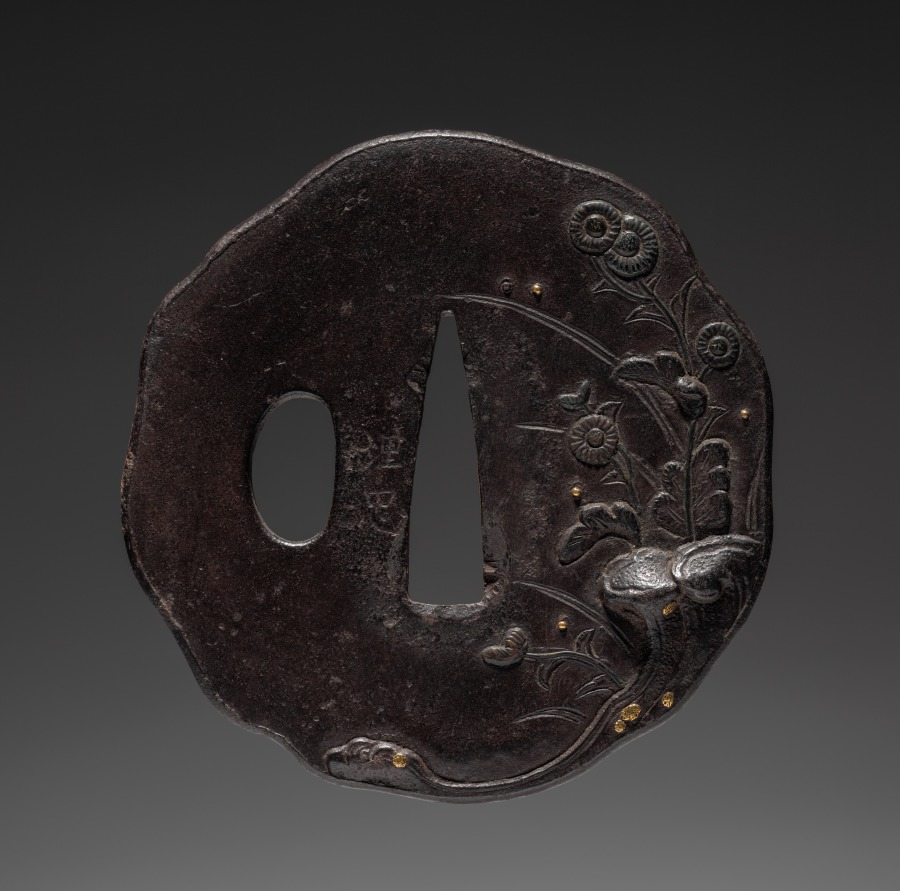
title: Sword Guard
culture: Japan, Edo period (1615–1868)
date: mid-1700s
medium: iron (Umetada type)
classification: Arms and Armor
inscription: signed "Umetada."